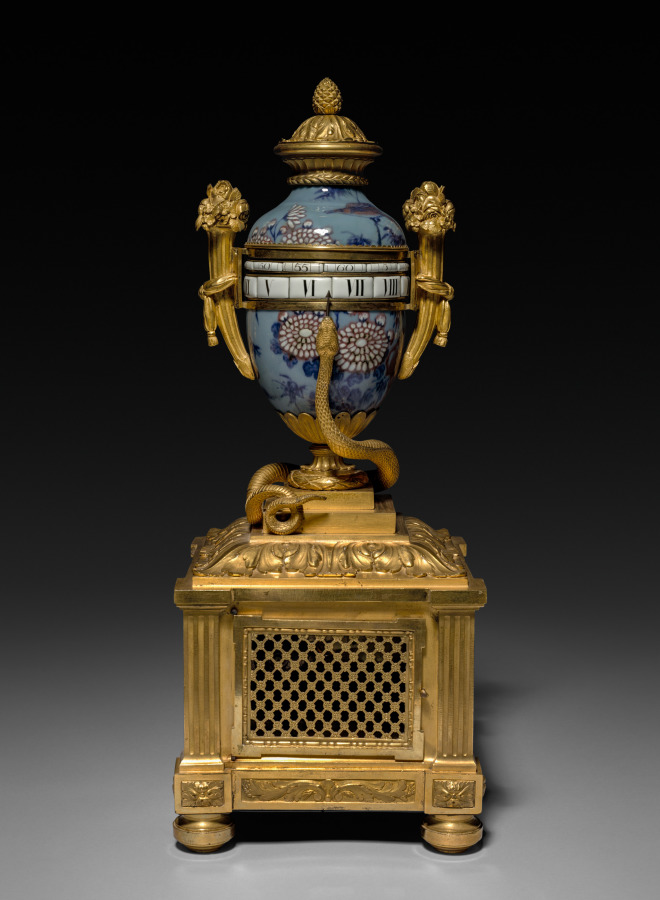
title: Garniture Set (one clock and 2 vases)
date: 1736–1770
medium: Chinese hard-paste porcelain, gilt bronze, enameled metal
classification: Furniture and woodwork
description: The fascination with Chinese porcelain among aristocratic circles increased during the reign of Louis XV. In reaction to the perceived excesses of elaborate naturalistic ornament of the 1750s, mount makers increasingly turned to neoclassical designs, known as Goût Grec (Greek taste) in the 1760s and 1770s. These beautifully chased gilt-bronze mounts feature classical Greco-Roman motifs such as lion masks, acanthus and laurel leaves, and pilasters.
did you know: A set of vases and clock, connected visually by the use of the same materials, often adorned a mantlepiece or the top of a large piece of furniture, such as a commode or console, within a room.